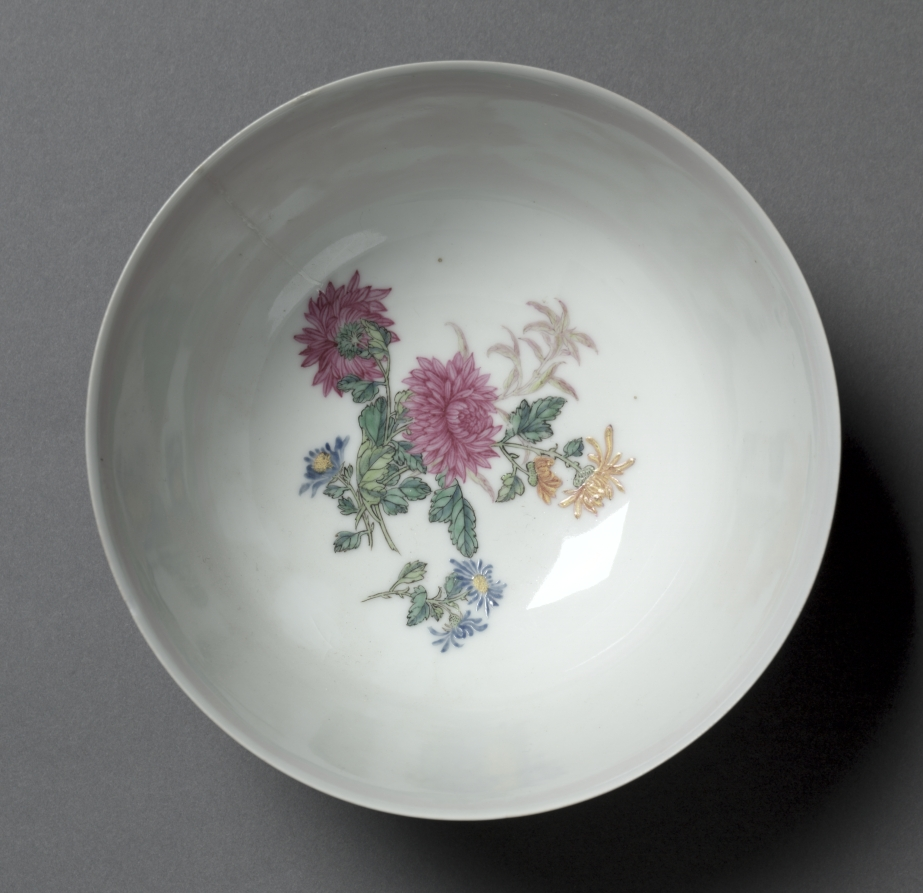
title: Bowl with Peony Sprays on Diaper Ground (exterior); Chrysanthemum Sprays (interior)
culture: China, Jiangxi Province, Jingdezhen, Qing dynasty (1644–1911), Qianlong mark and reign (1736–95)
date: 1736–95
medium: porcelain with famille rose overglaze enamel decoration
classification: Ceramic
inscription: 乾隆年製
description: The production of extraordinarily refined Qing imperial wares such as these could have involved the transportation of undecorated, plain porcelains from the imperial kilns in Jingdezhen, Jiangxi province, to the palace workshops in Beijing, where court painters applied the polychrome enamel decoration. The Qianlong reign mark on the base of the bowl is written with blue enamel over the transparent glaze.